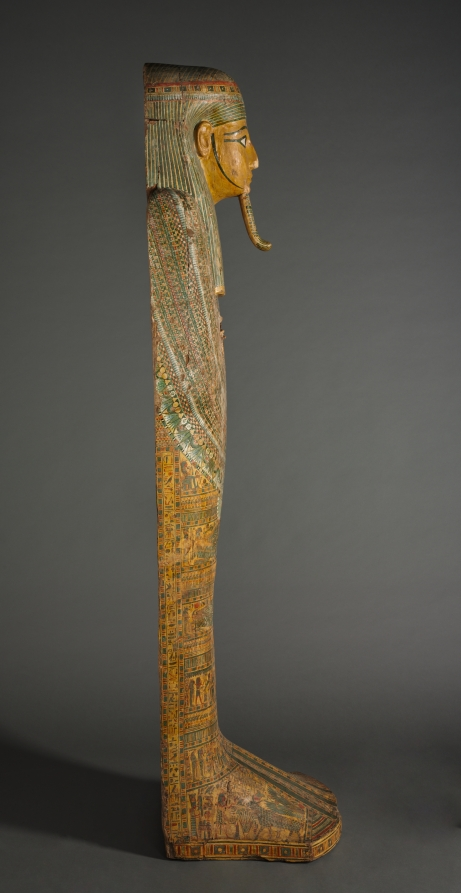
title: Coffin of Bakenmut (lid)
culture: Egypt, Thebes, Third Intermediate (1069–715 BCE), Dynasties 21–22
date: c. 1000–900 BCE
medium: gessoed and painted sycamore fig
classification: Funerary Equipment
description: The coffin of Bakenmut is one of the finest examples of painted wooden coffins made for the priests of Amen and their families at Thebes during Dynasty 21 and early Dynasty 22. The pharaohs of this time were no longer buried in the Valley of the Kings, but instead built tombs in the Delta, far to the north, where they resided. Security was lax in the Theban necropolis. The coffins and funerary goods of the wealthy citizens of Thebes were placed in unmarked and undecorated family tombs cut into the cliffs on the west bank of the Nile. All the care and detail that in more prosperous times were devoted to the decoration of the tomb chapel were now lavished on the elaborately painted coffins. Every available surface is crowded with religious scenes, images of funerary gods and goddesses, protective spells, and magical symbols. The deceased appears mummiform. An elaborate floral collar entirely covers the upper body, exposing only the separately attached hands (now lost). A pair of red "mummy braces" are crossed over the chest, their point of intersection marked by a winged sun disk. The lower body is covered with tiny figures modeled in gesso against a yellow background, which gives the effect of gold inlaid with glass or semiprecious stone. The decoration on the interior features two deified dead kings of Dynasty 18. Although these rulers had lived centuries before, memory of their greatness was still very much alive. The main scene near the top depicts Tuthmosis III, the great military pharaoh, who lived 500 years before Bakenmut. Posed as a mummy, the ruler wears a brilliant feathered garment enfolding him with falcon’s wings. The scene below features back-to-back seated images of Amenhotep I, regarded as the patron of the Theban cemetery and worshiped as a local god there.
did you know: Originally another smaller coffin was placed inside this outer coffin and in that the deceased with a mummy board would have rested.